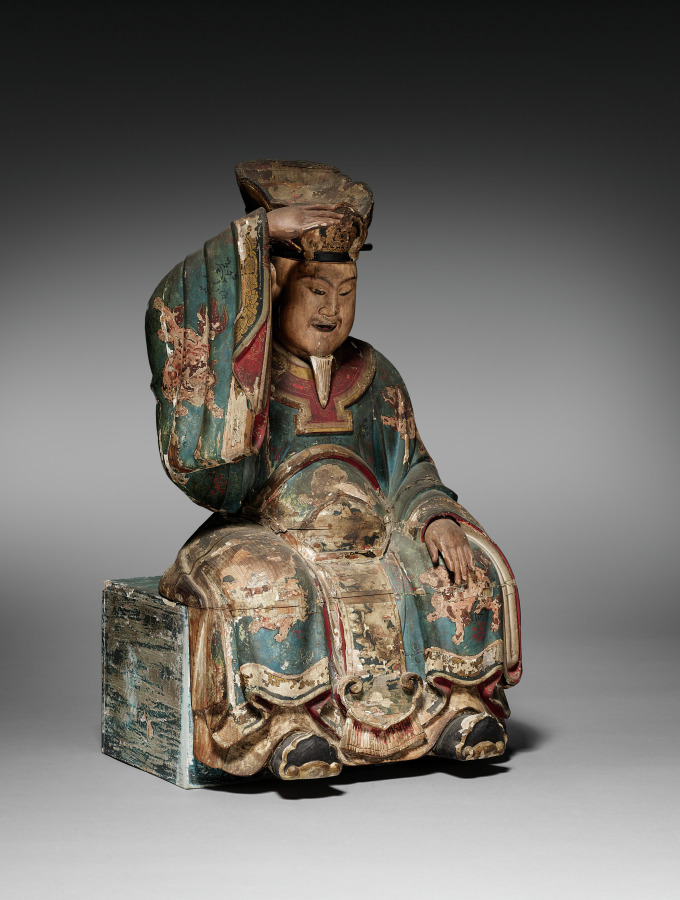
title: A King of Hell?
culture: Japan, Edo period (1615–1868)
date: c. 1800s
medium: wood, gesso, pigment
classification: Wood